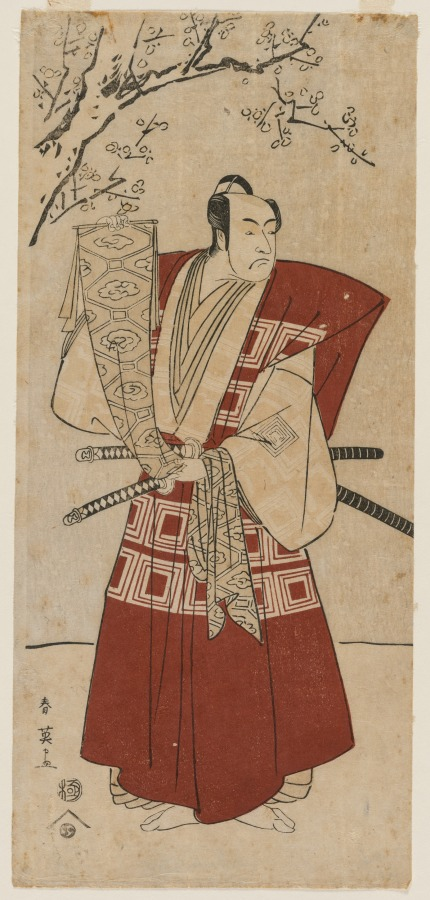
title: Ichikawa Monnosuke II as a Lord Holding a Banner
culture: Japan, Edo period (1615–1868)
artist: Katsukawa Shunei (Japanese, 1762–1819)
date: 1791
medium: color woodblock print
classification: Print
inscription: Signature: Shunei ga Publisher: Mishimuraya Yohachi (emblem) Censorship Seal: kiwame